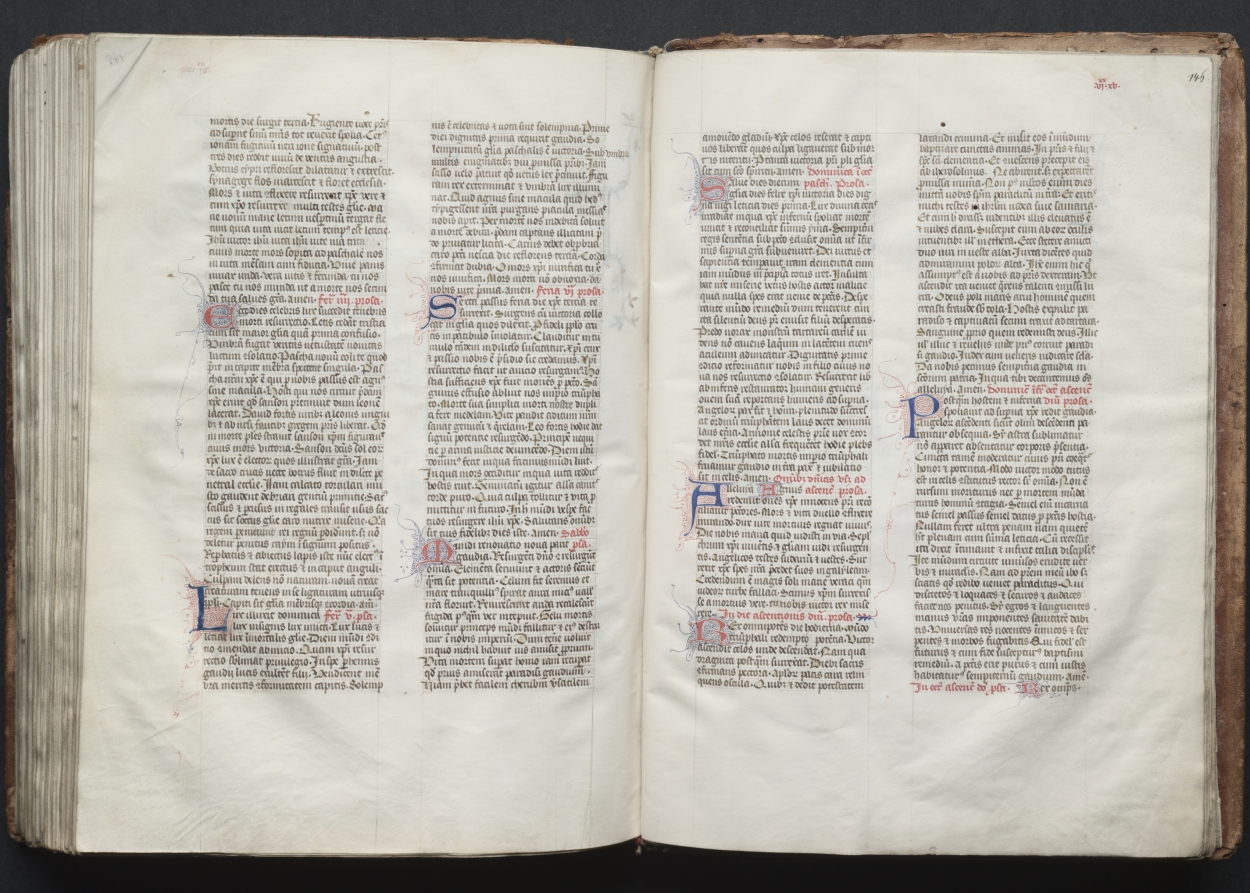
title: The Gotha Missal: Fol. 145vr, Text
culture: France, Paris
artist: Master of the Boqueteaux (French)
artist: and Workshop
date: c. 1375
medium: ink, tempera, and gold on vellum; blind-tooled leather binding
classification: Bound Volume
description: The style and quality of this manuscript's decoration is typical of deluxe Parisian books made for aristocratic or royal patrons. Most of the book's decoration appears to be the work of the Master of the Boqueteaux, an artist active at the court of King Charles V (died 1380). His style was apparently shared by a number of book illuminators working in and around Paris. It is very possible that the Gotha Missal belonged to Charles V, but is not provable because the manuscript has no royal portraits and lacks a colophon. Given the book's magnificent decoration, however, it would seem that it was produced for a Valois prince, if not for the king himself. The manuscript receives its name from the German dukes of Gotha, its later owners.